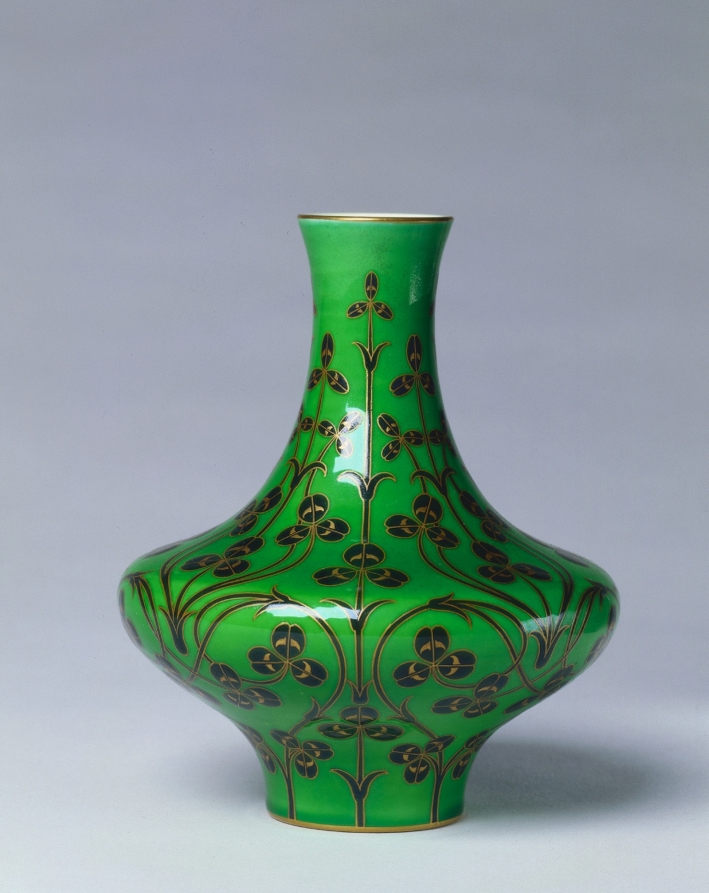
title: Vase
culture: France, Sèvres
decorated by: Henri-Louis-Laurent Ulrich (French)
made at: Sèvres Porcelain Factory (French, est. 1756)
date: 1897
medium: porcelain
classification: Ceramic